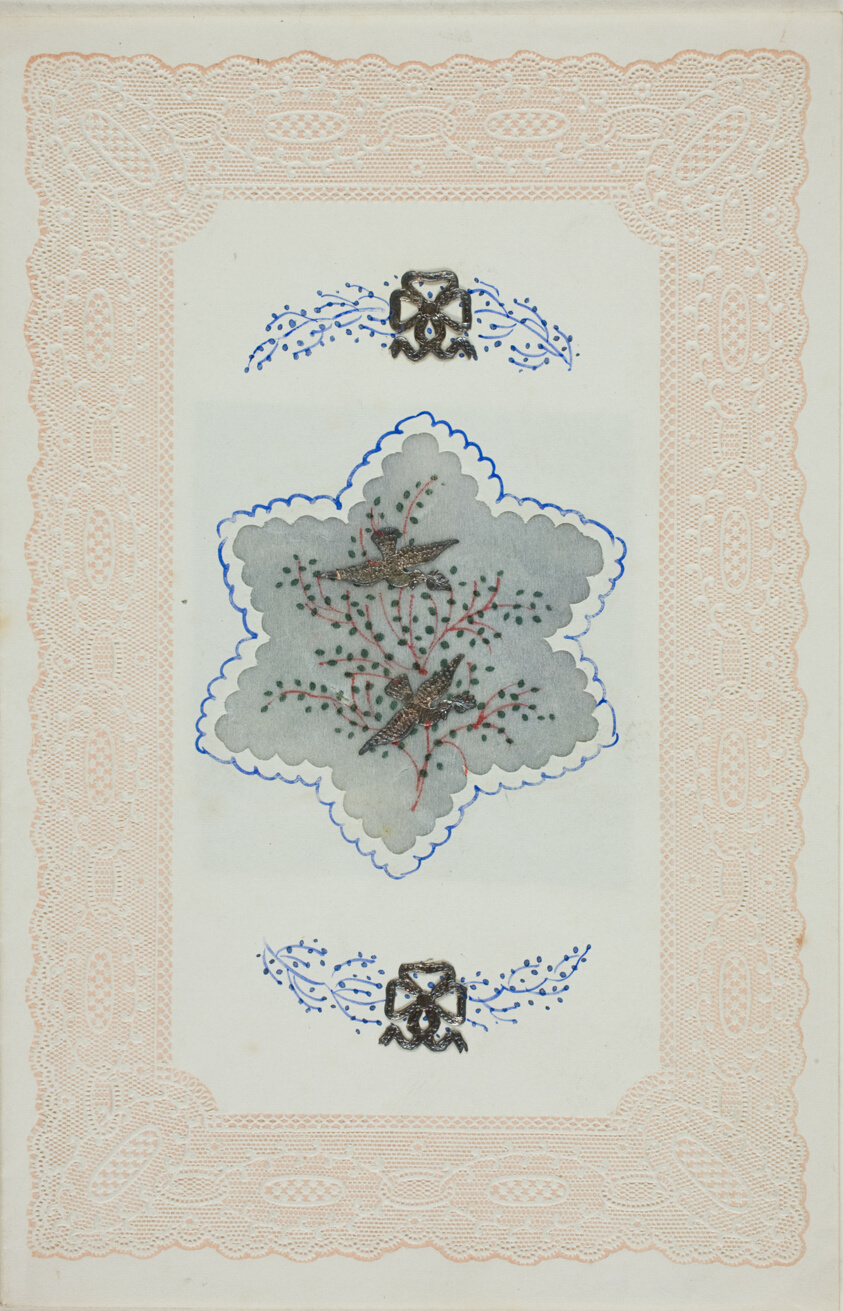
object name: Drawing and Watercolor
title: Untitled Valentine (Silver Birds on Blue)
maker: Unknown Artist; English, 19th century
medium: Collaged elements and watercolor on pink accented and embossed ivory wove paper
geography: England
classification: valentine; prints and drawing; paper